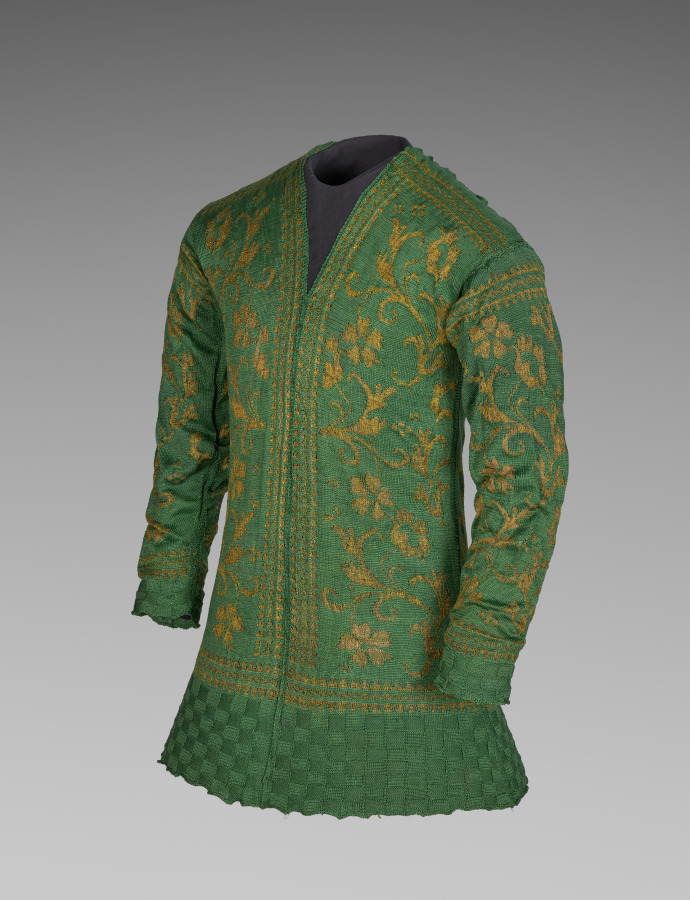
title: Knitted Hunting Jacket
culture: Italy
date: 1600s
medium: knitted silk with gold thread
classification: Garment